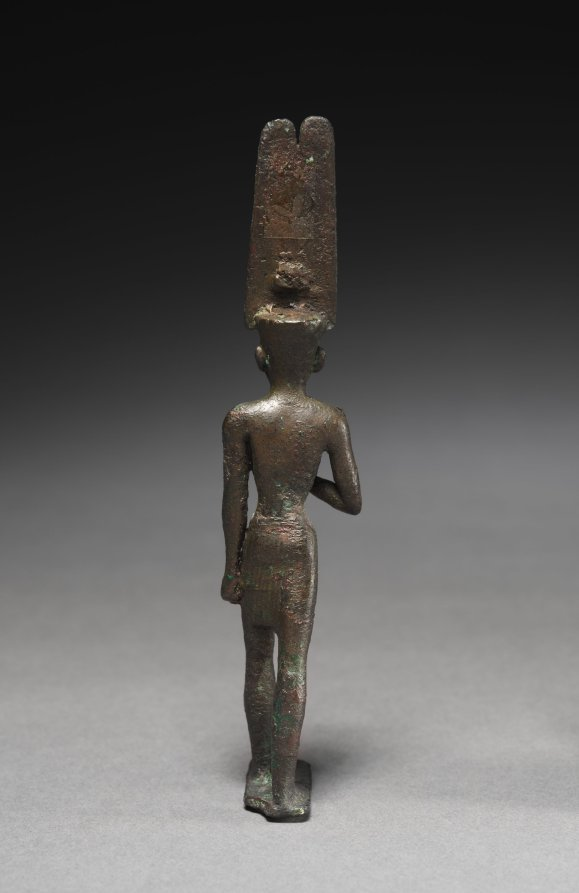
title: Statuette of Amen-Ra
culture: Egypt, Late period (715–332 BCE), Dynasty 26 or later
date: 664–525 BCE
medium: bronze, solid cast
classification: Sculpture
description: In this statue of Amen-Ra, the principal deity of the ancient Egyptian city of Thebes, his sun disk and double plume crown (here viewable as partial remains) represent his mystical powers, such as bringing light to the sky. In the Rick Owens ensemble, a light bulb helmet is reminiscent of the physical and mythological characteristics of Amen- Ra’s double plume crown. After a trip to Egypt, Owens designed his fall 2022 men’s collection, which centered around symbols associated with ancient Egyptian deities, playing into the mainstream mystical interest about that religion.